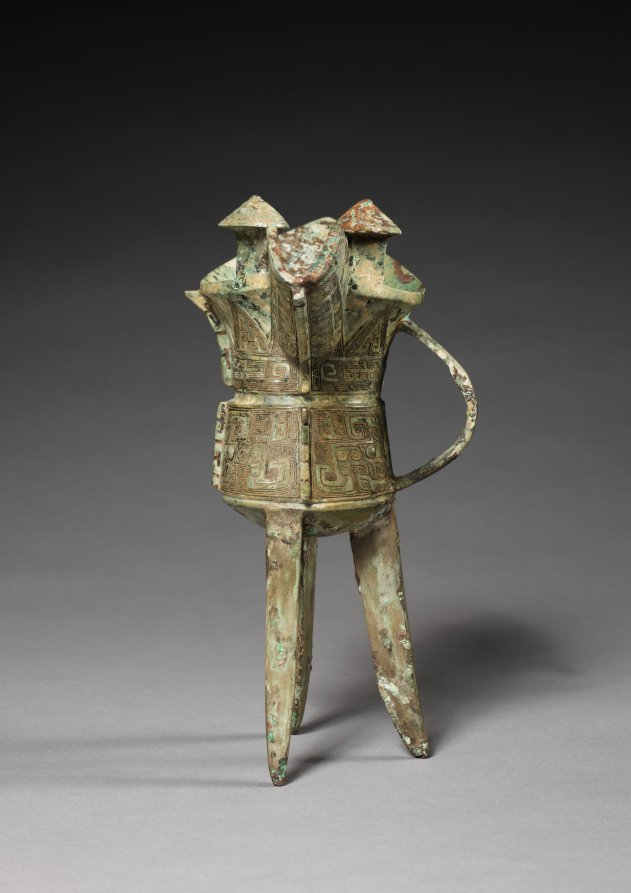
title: Wine Cups (Jue)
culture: China, Shang dynasty (c. 1600–c. 1046 BCE), Anyang phase (c. 1250–1046 BCE)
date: c. 1200 BCE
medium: bronze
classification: Metalwork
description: Wine and food played a major role in ritual offerings to the ancestral spirits and the Supreme Ancestor (Shangdi) performed by the Shang rulers in the state cult of ancestor worship. A variety of wine vessels—each type given a specific name—was cast to bear witness to the power and artistic vitality of this remote civilization. This example of a jue wine cup is for libations. Other major types of wine vessels include jia (wine warming vessel), fangyou (square wine container), and gu (beaker with a trumpeted mouth for pouring).